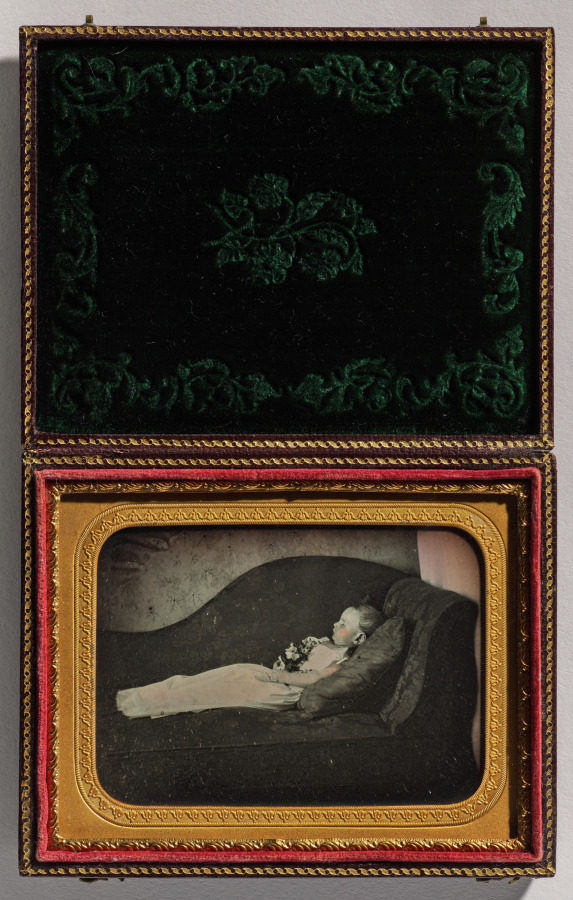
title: Dead Child On a Sofa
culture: America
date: c. 1855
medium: daguerreotype, applied color, quarter-plate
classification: Photograph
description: This carefully staged daguerreotype of a dead child is an outstanding example of a very common subject: the postmortem portrait. Using the stylistic conventions of the day, the unidentified artist successfully created a visually pleasing scene, despite the nature of the image. Dressed in white with a bouquet of flowers on the chest, the child, seen in profile, reclines on an elaborately patterned sofa. Delicate flesh tones were added to the cheek and arm, suggestive of a healthy child sleeping. The high rate of infant mortality throughout the 19th century made this variety of portraiture common, satisfying the emotional need of the parents to have a lasting memory of a loved one.